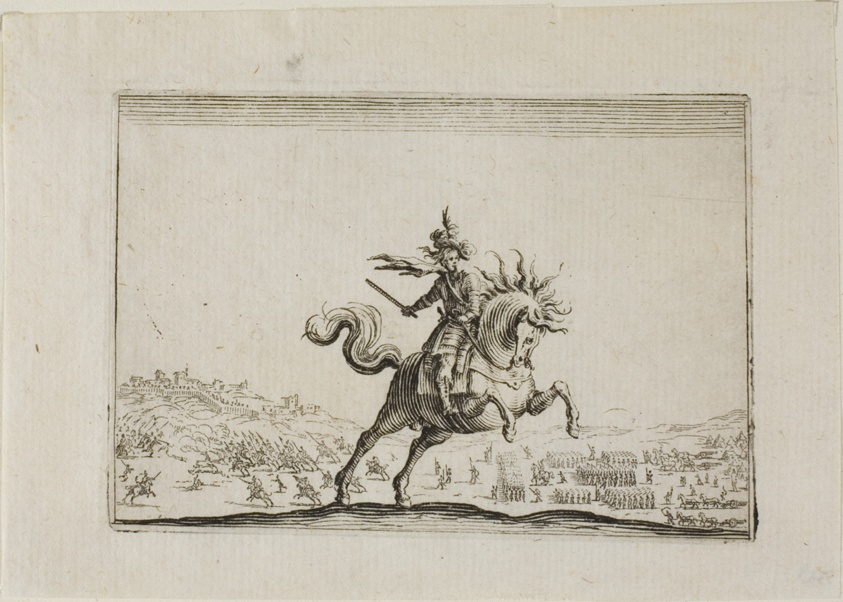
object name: Print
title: The Commander on Horseback, from The Caprices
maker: Jacques Callot (French, 1592-1635)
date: c. 1622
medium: Etching on ivory laid paper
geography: France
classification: etching; print; prints and drawing